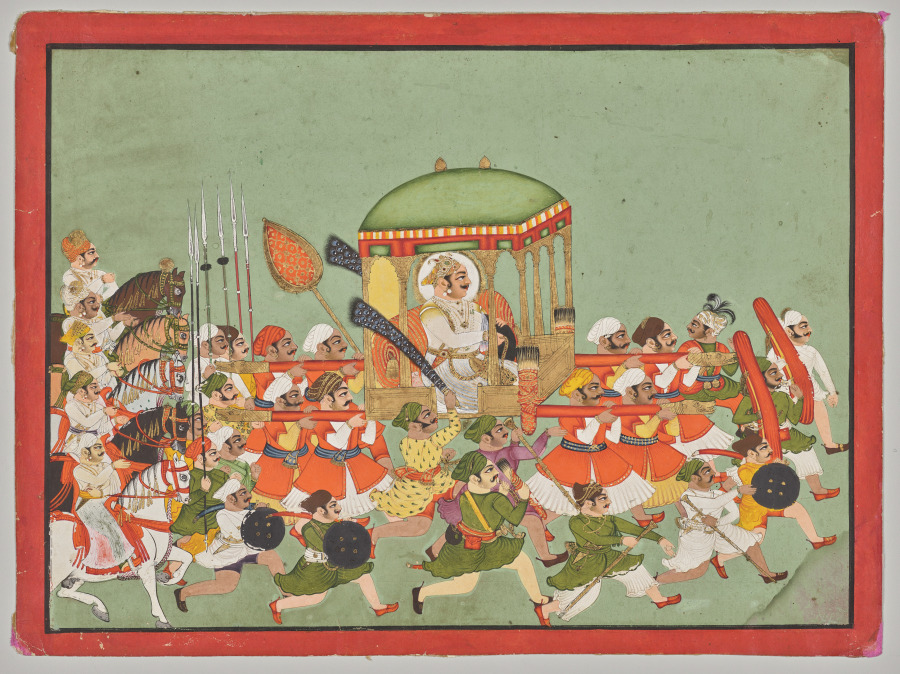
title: Maharao Chattar Sal (reigned 1758–64) of Kota in a Palanquin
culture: Northwestern India, Rajasthan, Kota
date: c. 1760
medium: Gum tempera and gold on paper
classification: Painting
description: The king sits in his litter with a sun and moon disk behind his head, emphasizing the light of divine sanction for his rule. His power and grandeur seem to inspire his attendants to stride with effortless enthusiasm. Symbols of royalty abound in his retinue: cavaliers on horseback, spear bearers, soldiers with swords and daggers, attendants with peacock-feather fans, and archers carrying bows draped in red and quivers full of arrows. The small kingdom of Kota achieved independence in 1624, and its rulers, called rao (king) or maharao (great king) in the local dialect of Rajasthani, supported an atelier of artists at their court. Kota artists were known for dynamic and idealized portrayals of their rulers engaged in activities that emphasized the king’s supreme status.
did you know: Quivers of arrows are tied to the front corners of the palanquin.